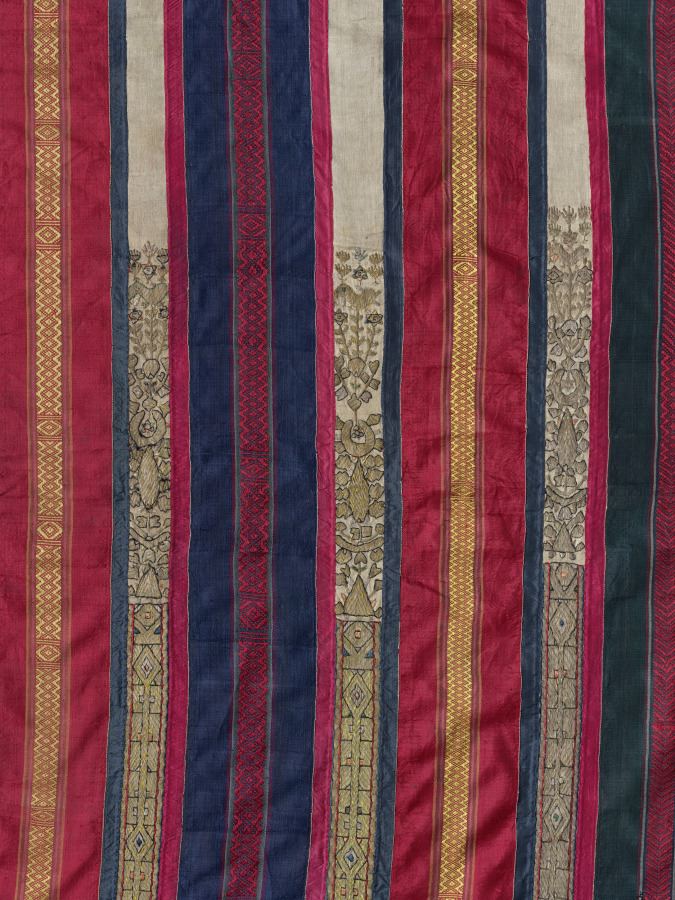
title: Curtain (one of a pair)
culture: Africa, North Africa, Tunisia, Djerba, Tunisian weaver(s) and embroiderer(s)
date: 1600s–1700s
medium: Silk, linen, metal, and dye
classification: Embroidery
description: One of a pair, this curtain displays colorful silk bands with woven geometric motifs, and cream bands with gold-embroidered plants, birds, six-pointed stars, and the khamsah (خمسة), an open five-fingered hand. Birds and the tree of life were popular good luck or fertility symbols linked to marriage. This curtain’s cosmopolitan motifs would have resonated with Jews, Muslims, and Christians alike, reflecting its creation on multiethnic and multireligious Djerba, an island off the Tunisian coast. There, both goldsmithing and gold thread embroidery were done by Jewish artisans (male and female, respectively). The fine materials suggest this curtain once hung in a wealthy home or for special occasions; interior wall hangings were typically made from rough wool.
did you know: When first acquired over a century ago, this curtain had fringe at its lower end.